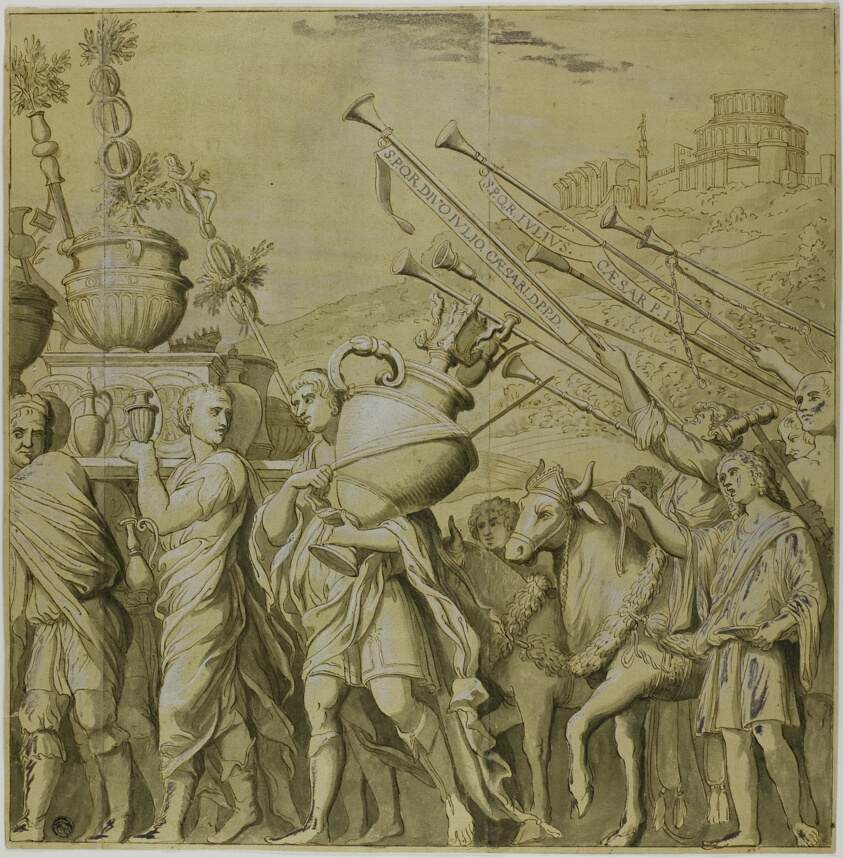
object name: Drawing and Watercolor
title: Triumphs of Julius Caesar: Canvas No. IV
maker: After Andrea Mantegna; Italian, 1431-1506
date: 18th century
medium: Pen and brown ink, with brush and gray wash, heightened with lead white (oxidized), on cream laid paper, pieced and prepared with yellow wash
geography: Italy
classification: pen and ink drawings; drawings (visual works); prints and drawing